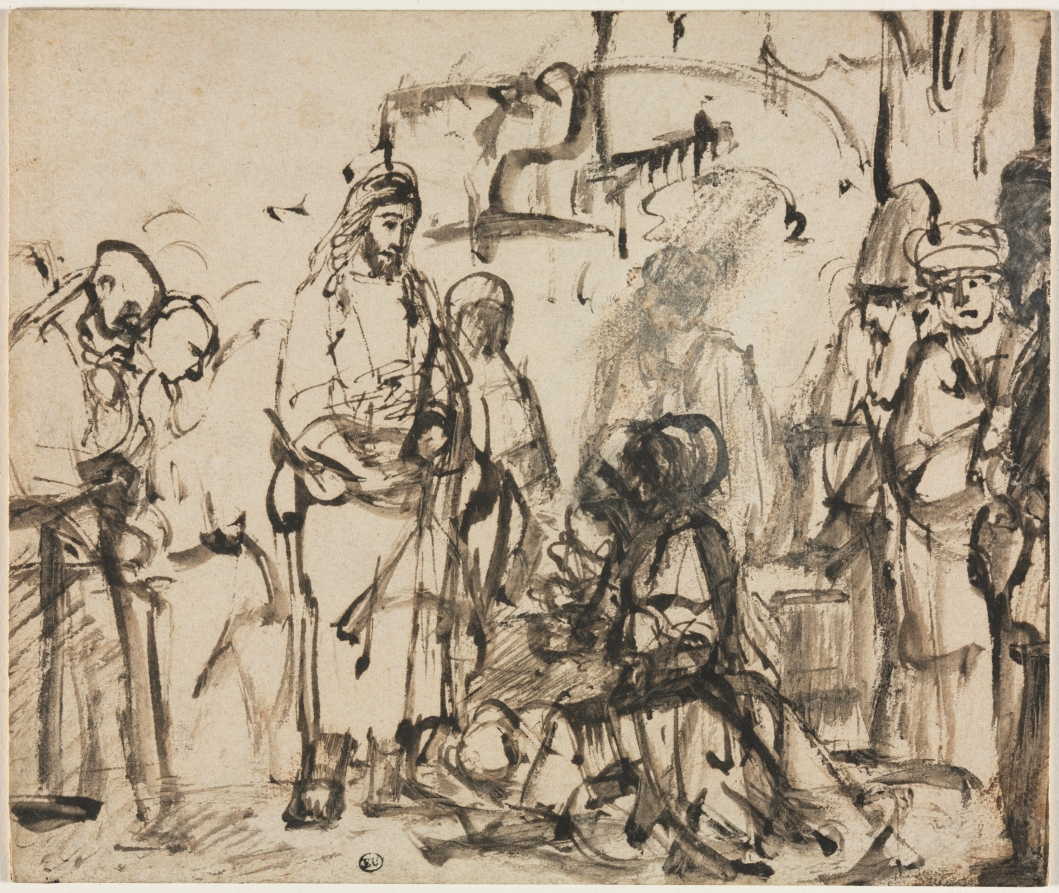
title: The Meeting of Christ with Martha and Mary after the Death of Lazarus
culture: Netherlands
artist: Rembrandt van Rijn (Dutch, 1606–1669)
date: c. 1662–65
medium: reed pen and brown ink and wash, heightened with white gouache (in the heads of the kneeling figures)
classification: Drawing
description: Scholars now consider this drawing a rare, late work by Rembrandt. Here, Christ meets with Martha and Mary after the death of their brother, Lazarus (John 11:30–36). The composed dignity of Christ's face and his calm compassion contrast with the prostrate figure of Mary and the agitated drawing of the kneeling Martha, whose outstretched hands are repeated three times, suggesting a frenzied expressivity. Above Martha, white gouache obliterates the figure of a standing man as well as a first version of Martha's head. The combination of rough power and sublime tenderness that characterizes Rembrandt's late drawing style is here demonstrated in the dramatic rendering of the sisters' grief and the sensitive portrayal of the bearded old man who dries his eyes with a kerchief at the right.